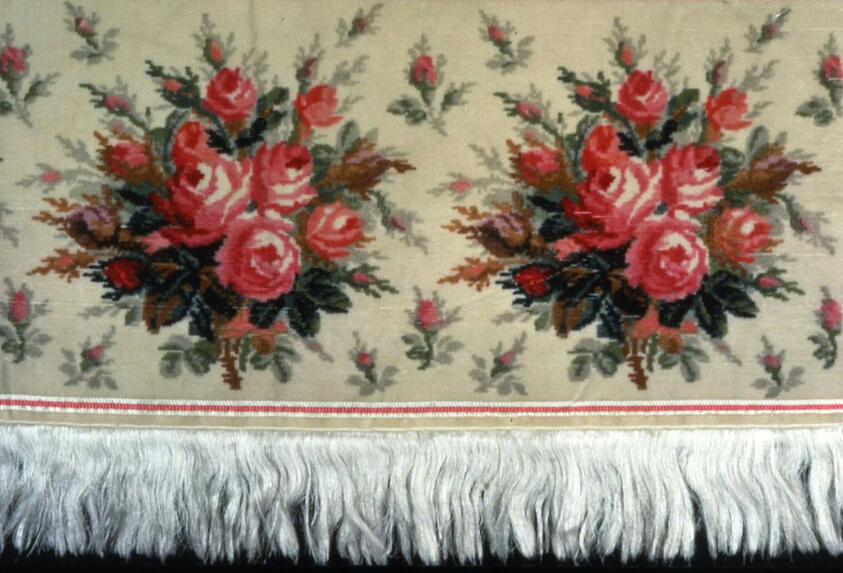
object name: Textile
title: Border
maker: France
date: 19th century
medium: Silk, plain weave with patterning wefts and painted pile warp uncut solid velvet (chiné); pile warp fringe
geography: France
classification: textile; weaving - velvet